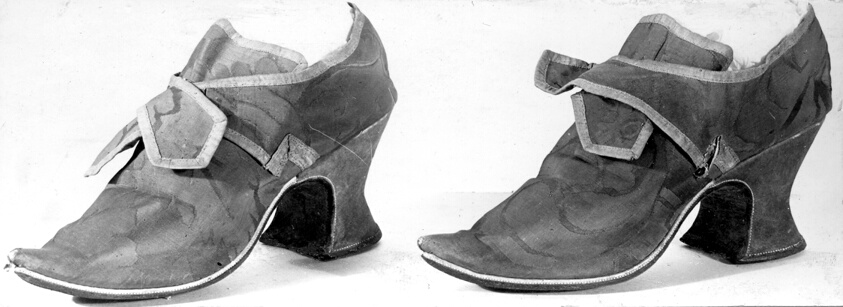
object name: Textile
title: Pair of Shoes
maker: England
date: c.1720s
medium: Silk, damask weave, and leather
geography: England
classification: textile; shoes - misc; costume accessory - shoe; costume; dress (garment); clothing